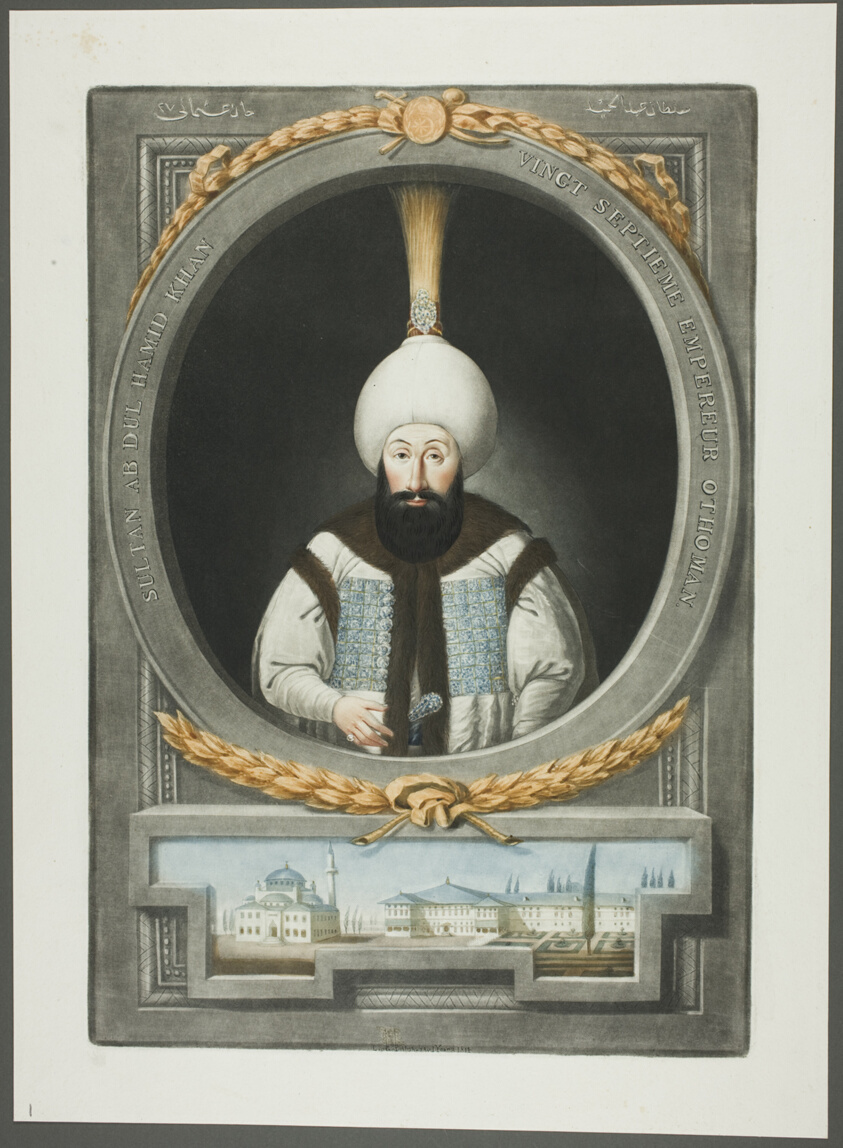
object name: Print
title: Abdul Hamid Khan, from Portraits of the Emperors of Turkey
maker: John Young (English, 1755-1825)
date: 1815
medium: Mezzotint, hand-colored with brush and watercolor, on ivory wove paper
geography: England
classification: mezzotint; print; prints and drawing